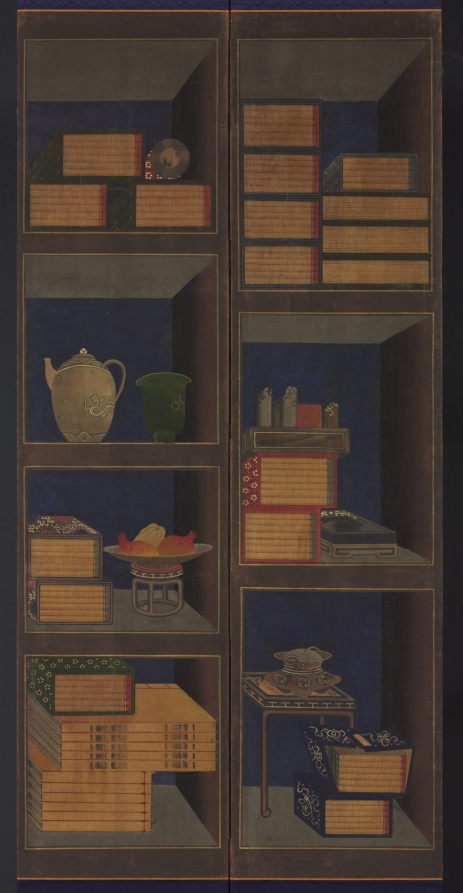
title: Books and Scholars’ Accoutrements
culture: Korea, Joseon dynasty (1392–1910)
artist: Yi Taek-gyun (Korean, 1808–after 1883)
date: late 1800s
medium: ten-panel folding screen; ink and color on silk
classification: Painting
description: First produced around the second half of the eighteenth century, chaekgado (literally, “pictures of bookshelves”) flourished throughout the 1800s as a royal emblem. And soon this pictorial genre became a popular furnishing item for aristocrats' elegant studies. The third panel from the right bears a hidden seal that reveals the artist: Yi Taek-gyun, a prominent court artist active in the late 1800s.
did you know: A convincing hypothesis that connects the Korean chaekgado tradition with the Renaissance tradition of illusionistic studiolo through the technique of trompe-l'œil and Chinese Qing period treasured cabinet paintings was first made in Park Shim-eun's thesis (2002).